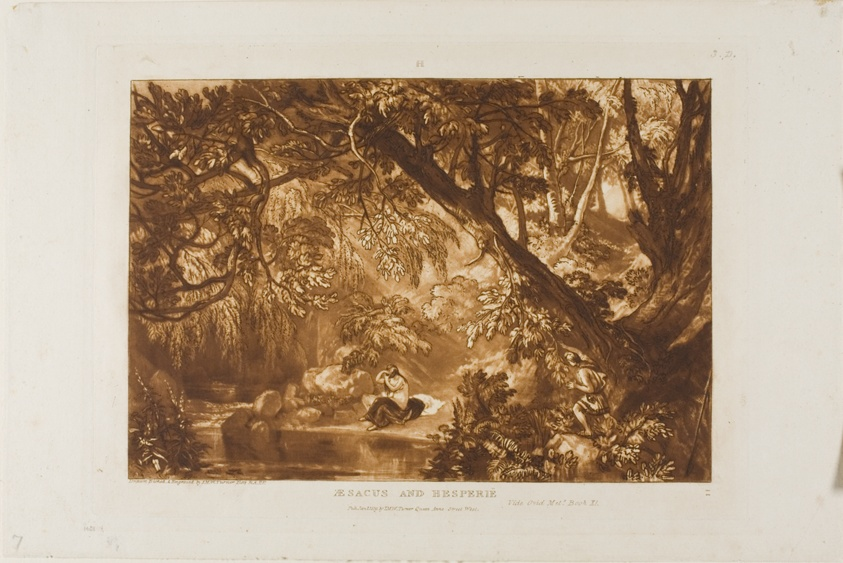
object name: Print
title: Aesacus and Hesperie, plate 66 from Liber Studiorum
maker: Joseph Mallord William Turner (English, 1775-1851)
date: published January 1, 1819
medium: Etching and engraving in brown on off-white paper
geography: England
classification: mezzotint; print; prints and drawing